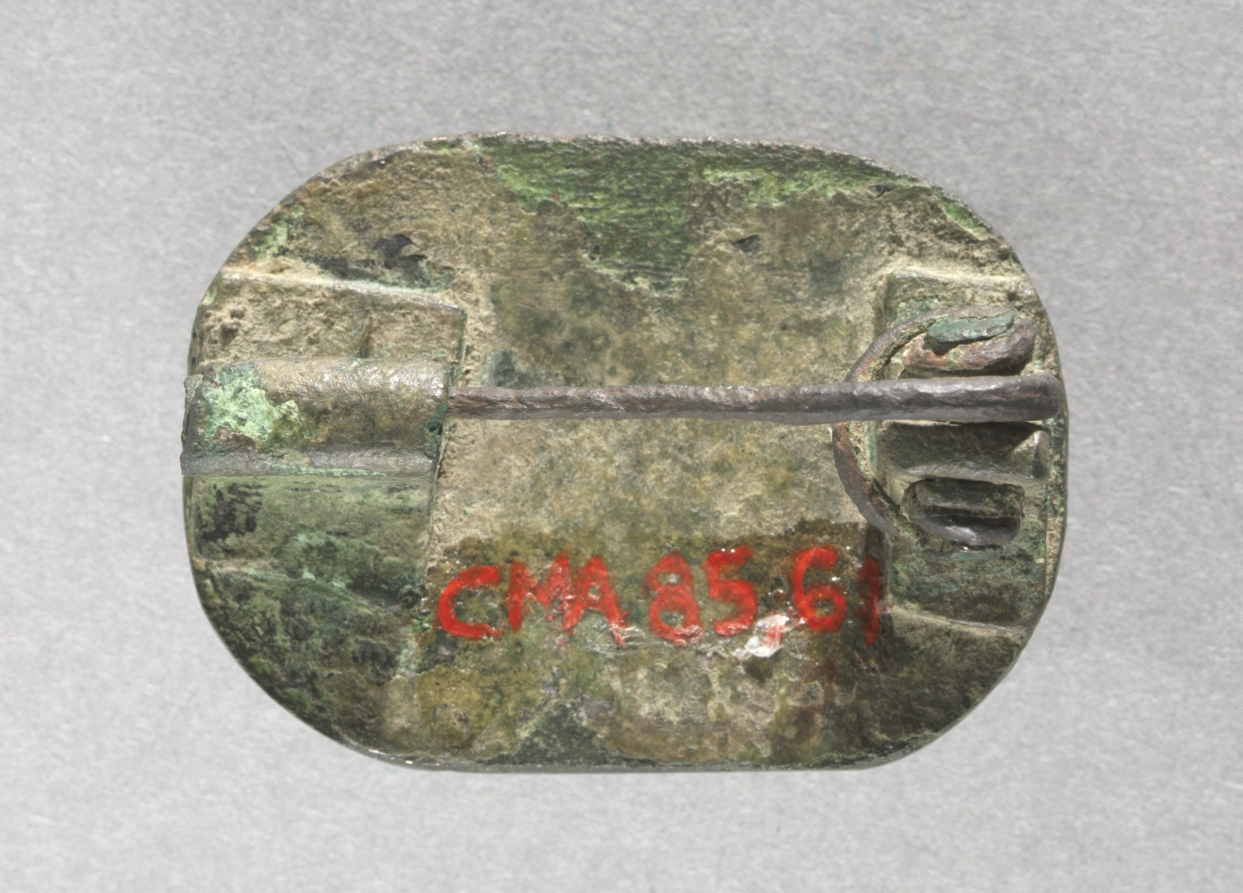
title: Votive or Civic Badge with a Crowned Figure Kneeling before Christ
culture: Italy, Venice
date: c. 1300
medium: gold repoussé medallion under glass inset within a bronze clasp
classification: Metalwork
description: This brooch was probably made to fasten a ceremonial cloak, and may have been intended as a diplomatic gift or memento. The central composition parallels the main face of the famous gold coin, a ducat, of the Venetian Doge Giovanni Dandolo minted in 1288-1289. Unlike the coin, the medallion is neither struck or diecast; it is tooled and chased, making it one of a kind.